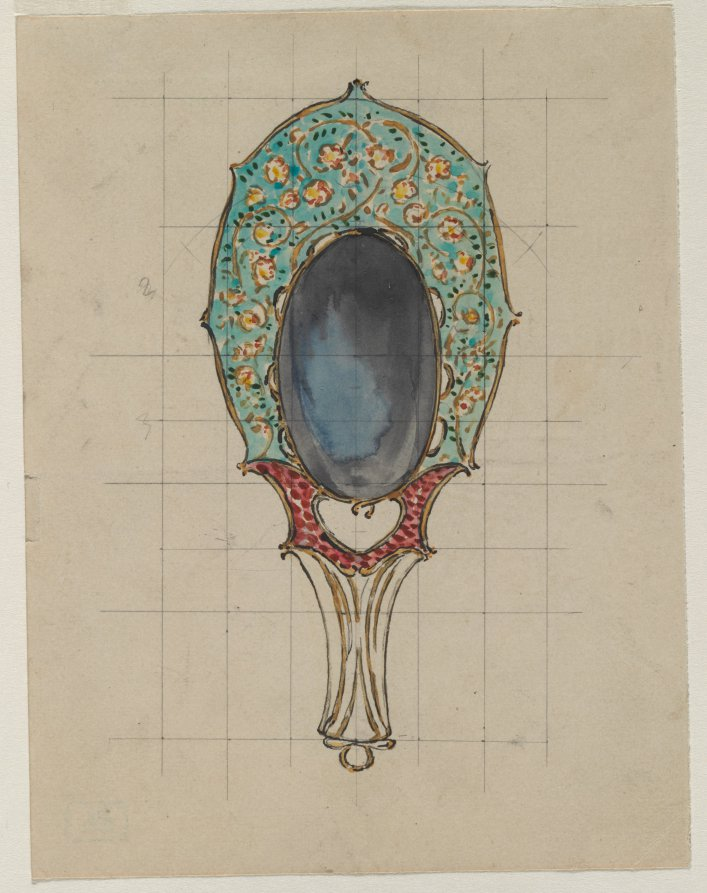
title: Design for a Hand Mirror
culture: France, 20th century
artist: Félix Bracquemond (French, 1833–1914)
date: c. 1900–1902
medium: watercolor and black ink with graphite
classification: Drawing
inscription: The window mat bears an inscription written in graphite pencil along the bottom edge: "ENCRE DE CHINE/ET/AQUARELLE/BRACQUEMOND (FELIX) - 1833 - 1914 PROJECTS DE MIROIR UTILISANT UN BAS RELIEF DE RODIN Rep_?_ Arts Decoration 1902 Tome XII p. 10 Pour le Baron Vita."